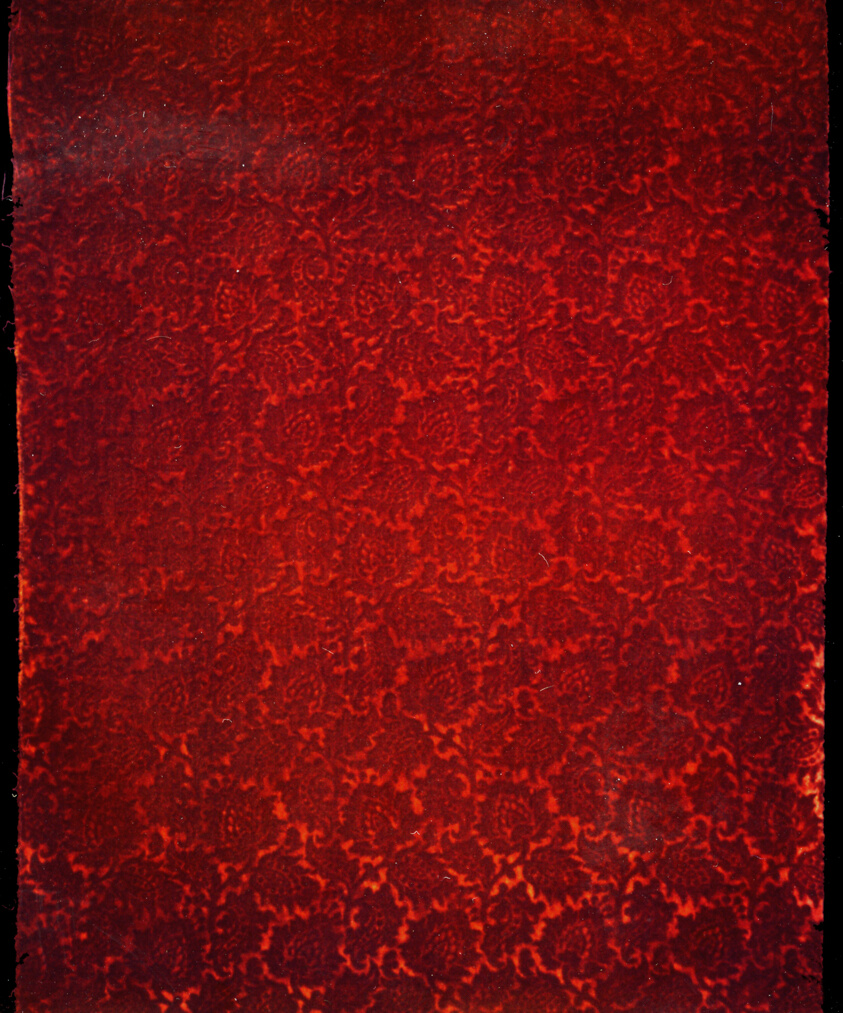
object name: Textile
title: Panel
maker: Netherlands or Northern France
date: 1600/50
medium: Cotton and wool, plain weave with supplementary pile warps forming cut, solid velvet; stamped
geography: Netherlands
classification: textile; weaving - velvet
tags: fruit